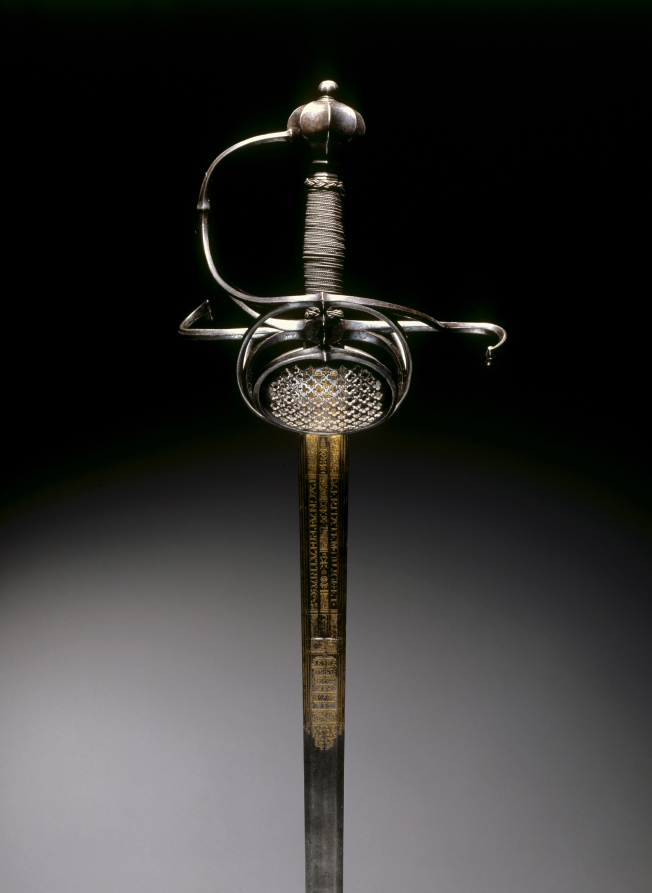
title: Rapier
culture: Germany, Solingen, 17th century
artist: Clemens Horn (German, 1586–1617)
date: c. 1620–30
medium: steel, blued and gilded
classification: Arms and Armor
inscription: NEC TEMPARE NEC TIMIDE / INTER ARMA SILENT LEGE / VERITATEM DILIGE ET PUGNA PRO PATRIA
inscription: Unicorn Head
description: This weapon has an especially handsome configuration of hilt, pommel, quillons, and guard. The blade is also very finely wrought and bears the mark (a unicorn head) of the German swordsmith, Clemens Horn, of Solingen, a town near Düsseldorf. The Latin inscription on the blade reads in translation: "Neither without cause, nor fearfully/Between arms and silent law/ Prize truth and the fight for one's country."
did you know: The "Pappenheimer" hilt seen here is named after Count Pappenheimer (1594-1632) who popularized the style which offered more protection to the hand with its large pierced plates.